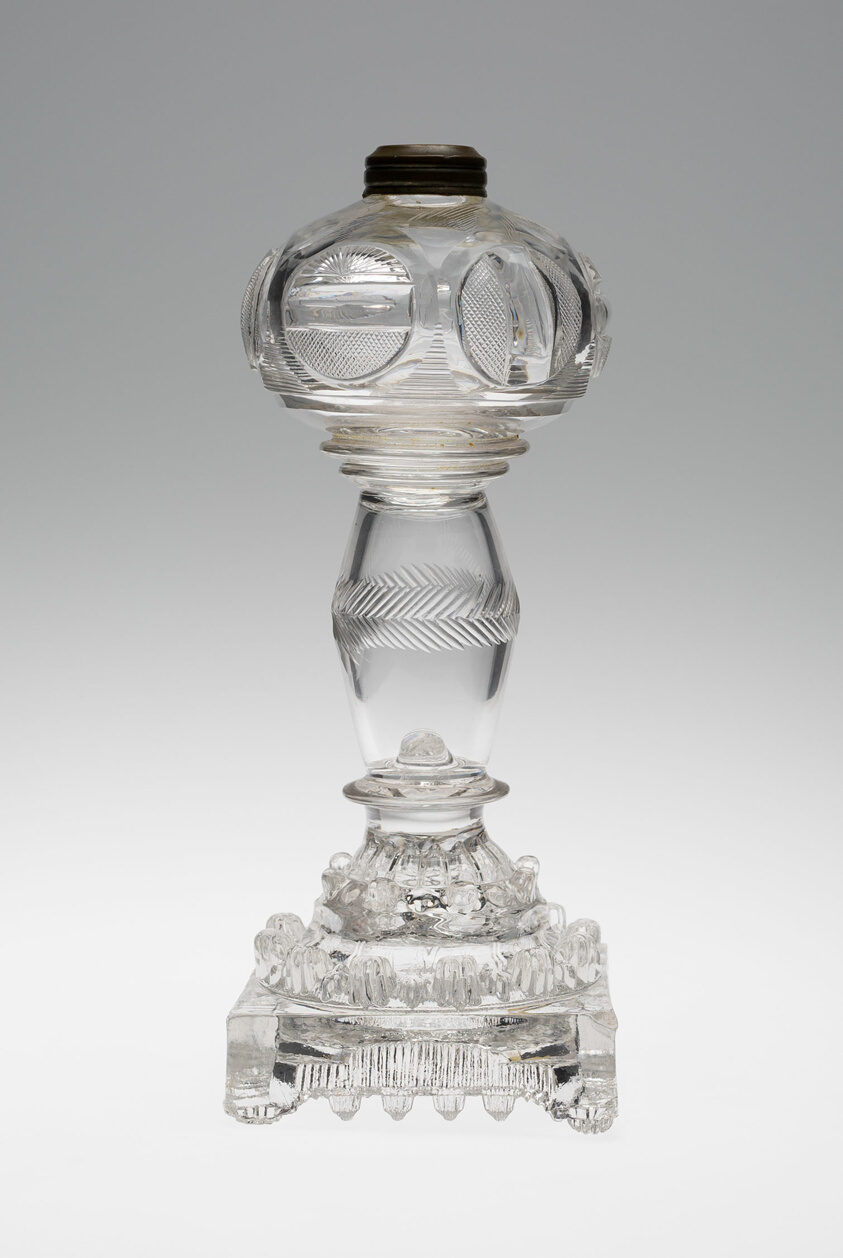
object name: Glass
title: Pair of Lamps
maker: Attributed to Union Flint Glass Works; American, founded 1826; Kensington, Pennsylvania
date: 1835–40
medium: Glass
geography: Philadelphia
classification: furniture accessory; american decorative arts; american arts; decorative arts